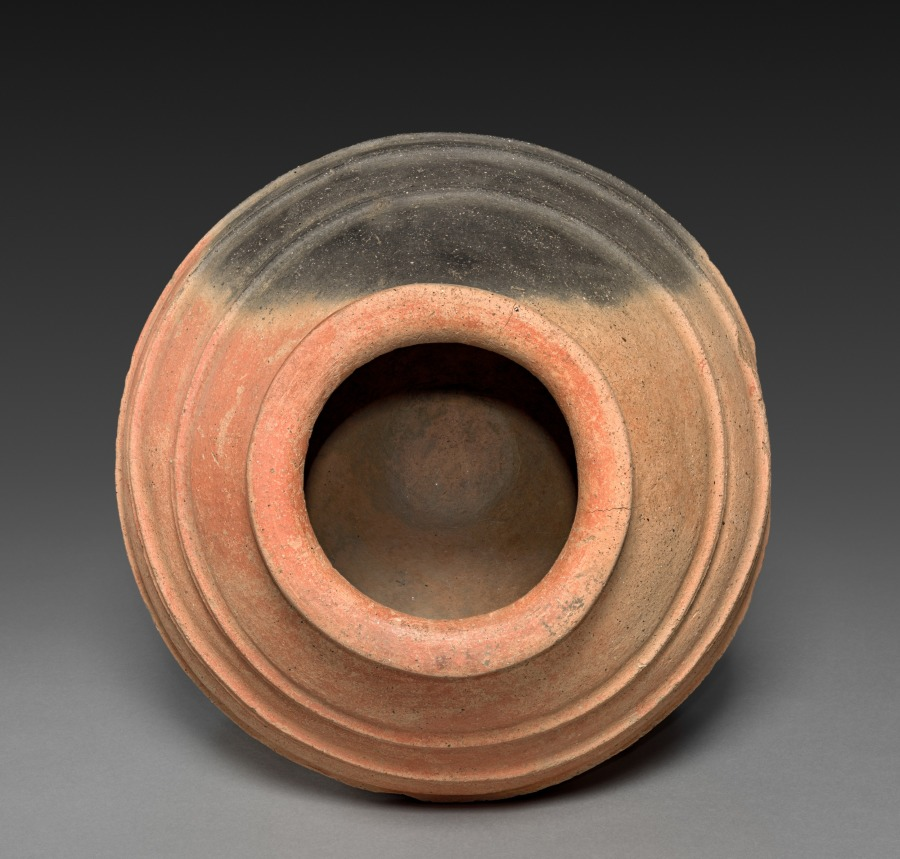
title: Jar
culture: Japan, Yayoi period (c. 300 BCE–300 CE)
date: c. 100 BCE–100 CE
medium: burnished earthenware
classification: Ceramic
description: The banding around this jar’s upper portion is an unusual feature for Yayoi pottery, which usually has a flat surface. It was likely made in western Japan, between Seto in Aichi prefecture and Kyushu, the southernmost main island. It is not believed to be a cooking vessel, but may have been used for storage. The ash spots occurred naturally during firing.